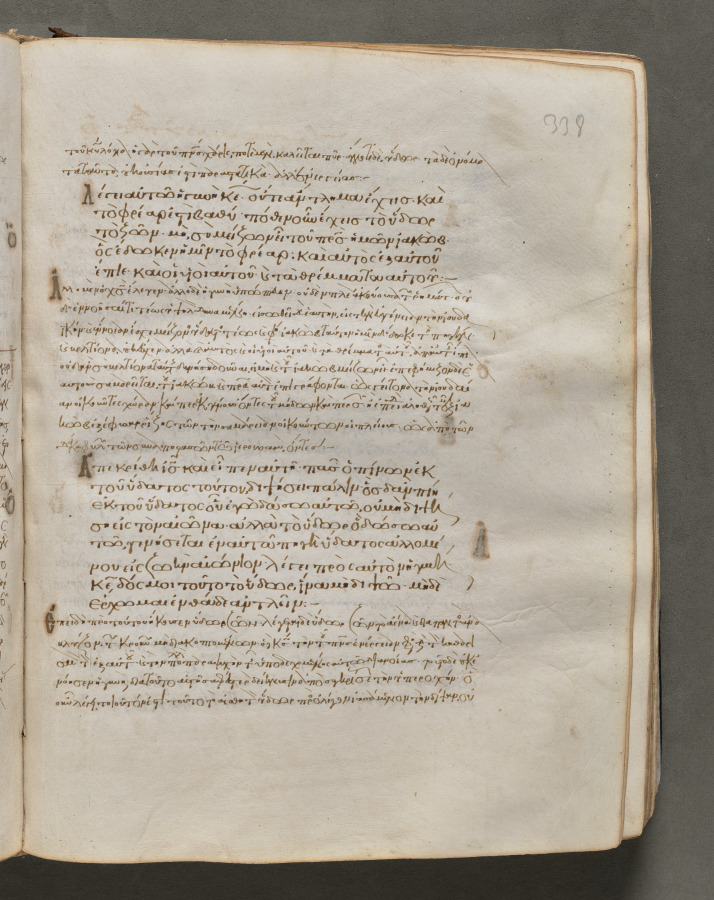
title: Text, folio 338 (recto), from a Gospel Book with Commentaries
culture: Byzantium, Constantinople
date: c. 1000–1100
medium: ink, tempera, and gold on vellum; leather binding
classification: Bound Volume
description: Each of the four gospels in this book opens on a page with brilliantly illuminated borders depicting the author of the text as well as birds—principally peacocks, symbols of the immortality of the soul—and fountains, representing the fountain of life and the salvation of the soul. This volume consists of 428 leaves with texts in Greek. Its level of sophistication suggests that it was probably written and decorated in a monastery in Constantinople.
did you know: Gospel books were carried in procession through Byzantine churches.